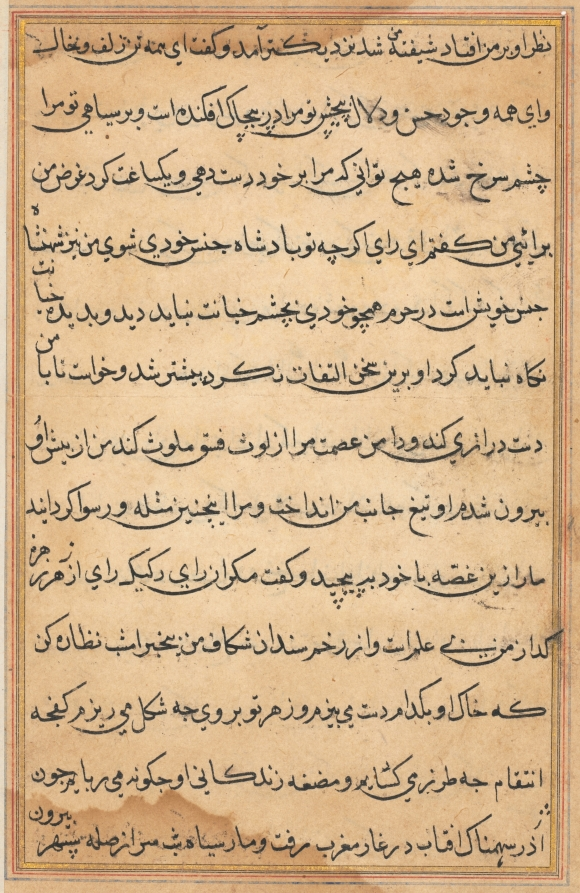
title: Page from Tales of a Parrot (Tuti-nama): text page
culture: Mughal India, court of Akbar (reigned 1556–1605)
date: c. 1560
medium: gum tempera, ink, and gold on paper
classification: Painting